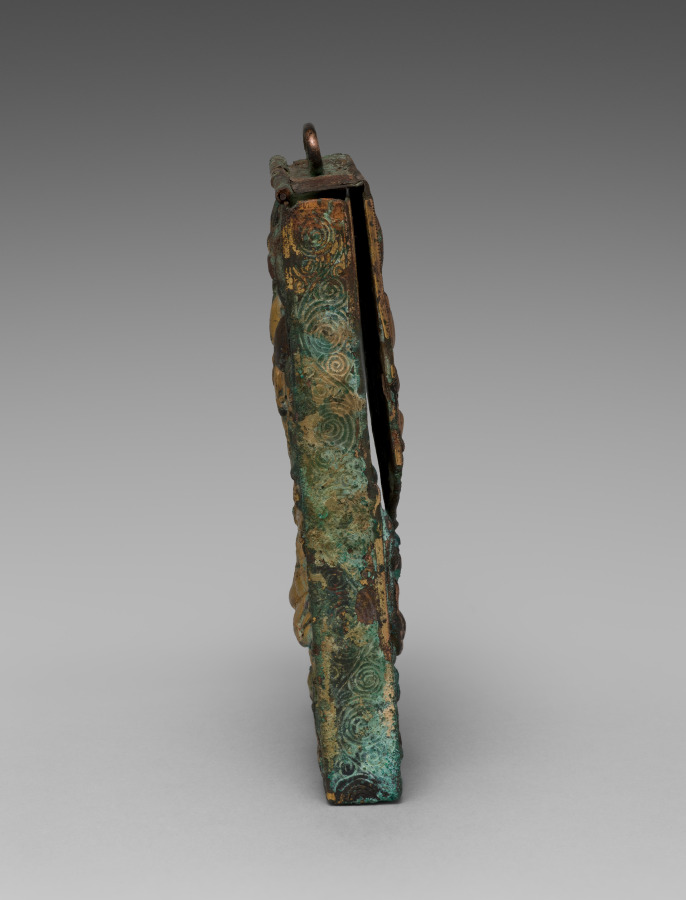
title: Sutra Container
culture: Korea, Goryeo dynasty (918–1392)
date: 1100s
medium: gilt bronze with incised and high relief decoration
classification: Metalwork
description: This is a portable container once used to preserve a miniature Buddhist sacred text. Created by hammering the reverse, high-relief designs on both the front and back of the case depict a peaceful pond where young boys are holding giant lotus flowers in their hands, and a pair of mandarin ducks are swimming. Probably the playful boys represent newly reborn souls in the Pure Land.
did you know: This is a portable container once used to preserve a miniature Buddhist sacred text, particularly useful for traveling Buddhist pilgrims.